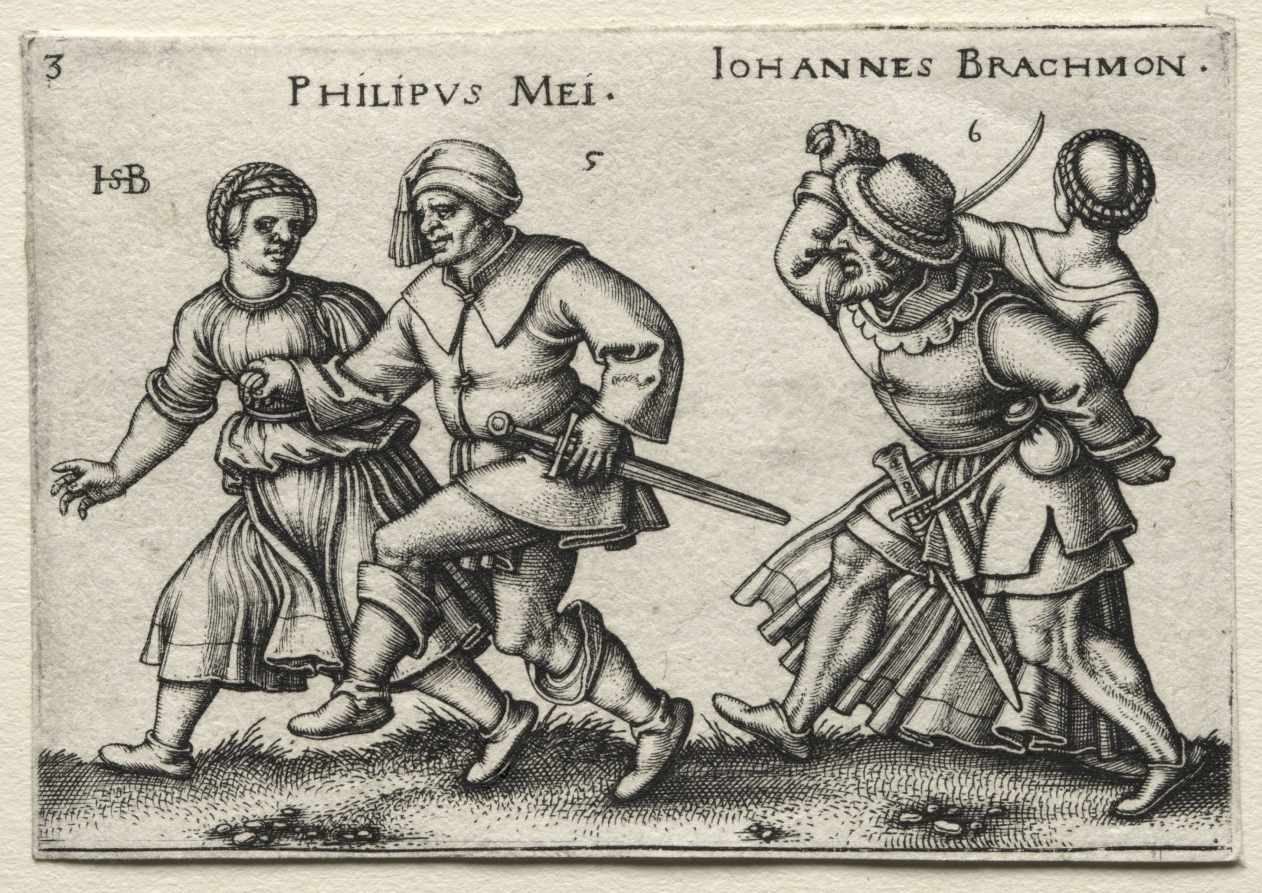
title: The Village Wedding: Philipus Mei / Johannes Brachmon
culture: Germany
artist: Hans Sebald Beham (German, 1500–1550)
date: 1546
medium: engraving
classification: Print